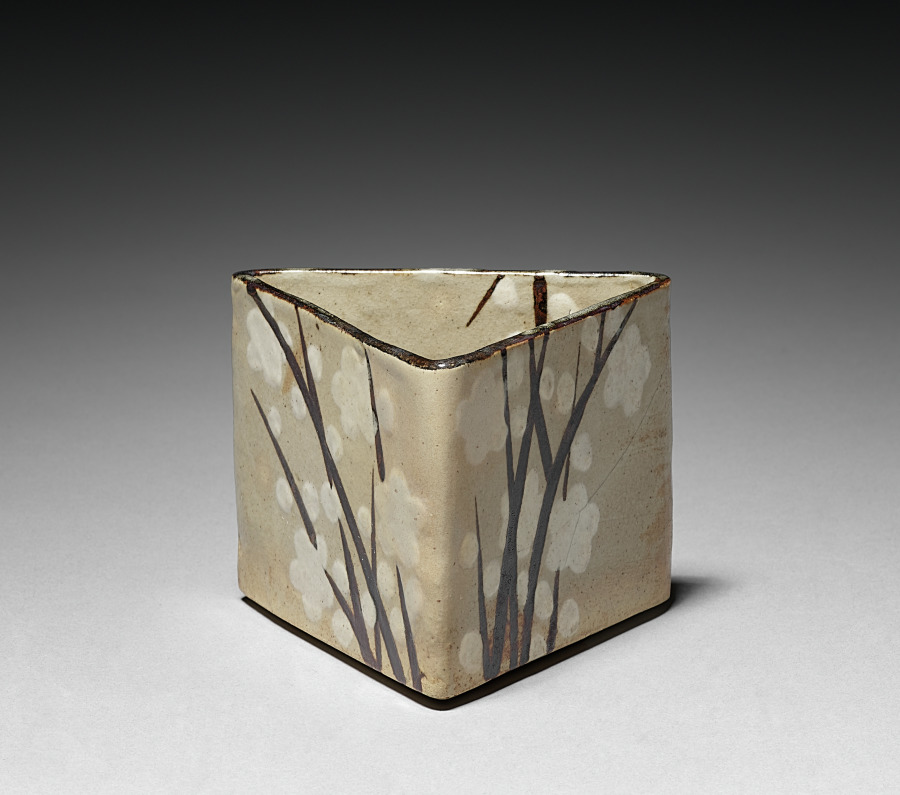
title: One of Five Serving Bowls (Mukozuke) with Prunus Design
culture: Japan, Edo period (1615–1868)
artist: school of Ogata Kenzan (Japanese, 1663–1743)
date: 1700s to mid-1800s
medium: Kyoto Ware: stoneware with underglaze iron oxide and slip decoration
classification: Ceramic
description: Note the rough, tan, clay bodies of these bowls with their deliberate irregularities. The design of branches was first painted in a black iron oxide, then the blossoms and buds in a white slip, followed by the application of a very thin transparent overglaze.